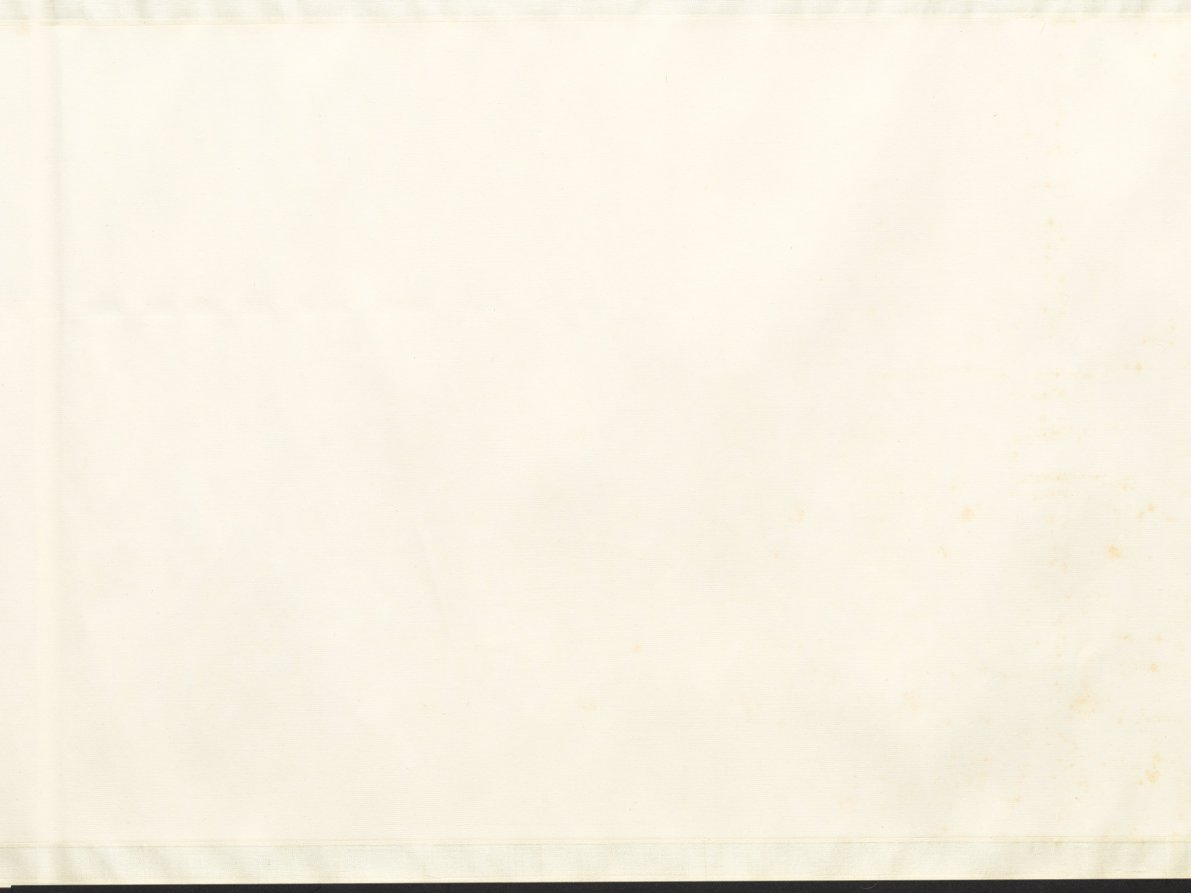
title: Fisherman's Joy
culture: China, Ming dynasty (1368–1644)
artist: Qian Gu (Chinese, 1508–c. 1578)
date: 1572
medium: Handscroll; ink and light color on paper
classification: Painting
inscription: Artist's inscription, signature, and seal: On the autumn day of the jen-shen year [1572], P'eng-ch'eng, Ch'ien Ku painted [this]. [seal] Hsüan-ch'ing shih. 2 colophons, both dated 1689, and 5 additional seals of Yün Shou-p'ing (1633-1690).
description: This painting has a scene showing two small crafts, each manned by two fishermen, practicing a traditional fishing method. In one of them, a man uses a bamboo pole to direct the movements of a cormorant bird sent into the water. Cormorant fishing, witnessed in some areas of the lower Yangzi River, appears in Zhe school paintings. Qian Gu may have borrowed these narrative figure scenes from Zhe school paintings, while his vantage point, brushwork, and soft tones align with the Wu school style. Scenes of fishermen appealed to urban and educated audiences who idealized the self-sufficient independence of fisherfolk.